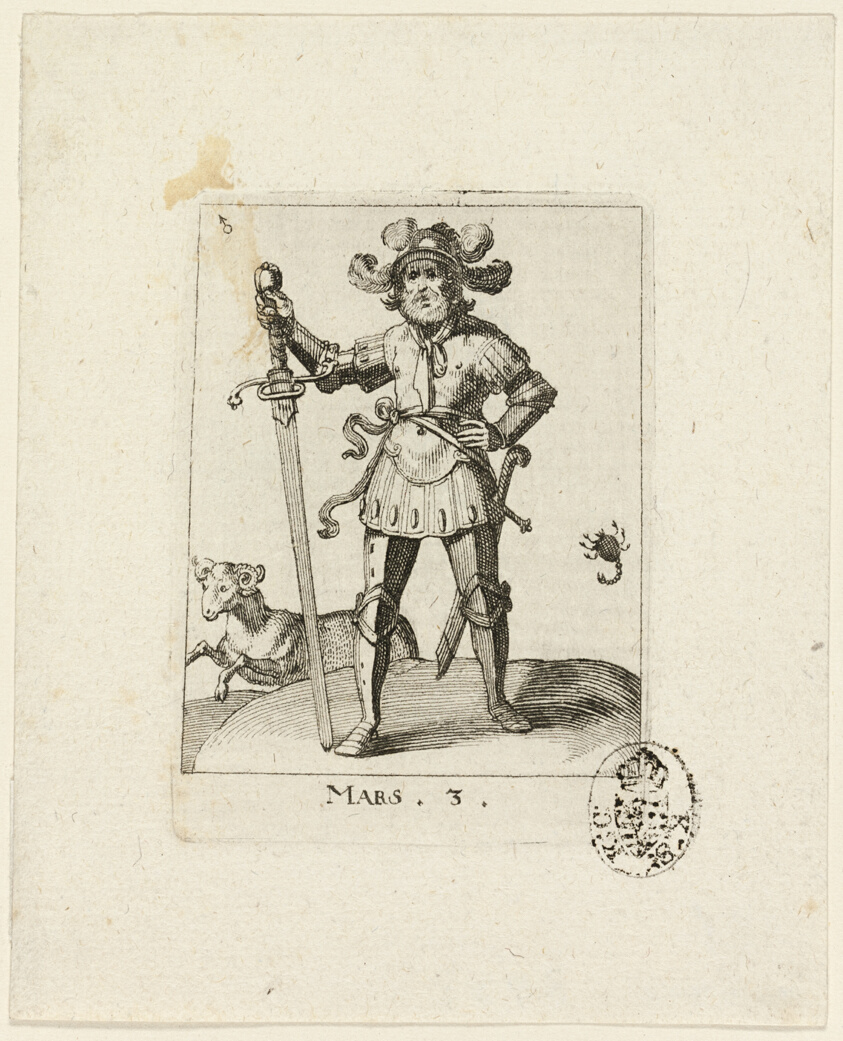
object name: Print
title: Mars, plate three from Der VII Planeten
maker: Conrad Meyer (Swiss, 1618-1689)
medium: Etching in black on ivory laid paper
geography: Switzerland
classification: etching; prints and drawing; print